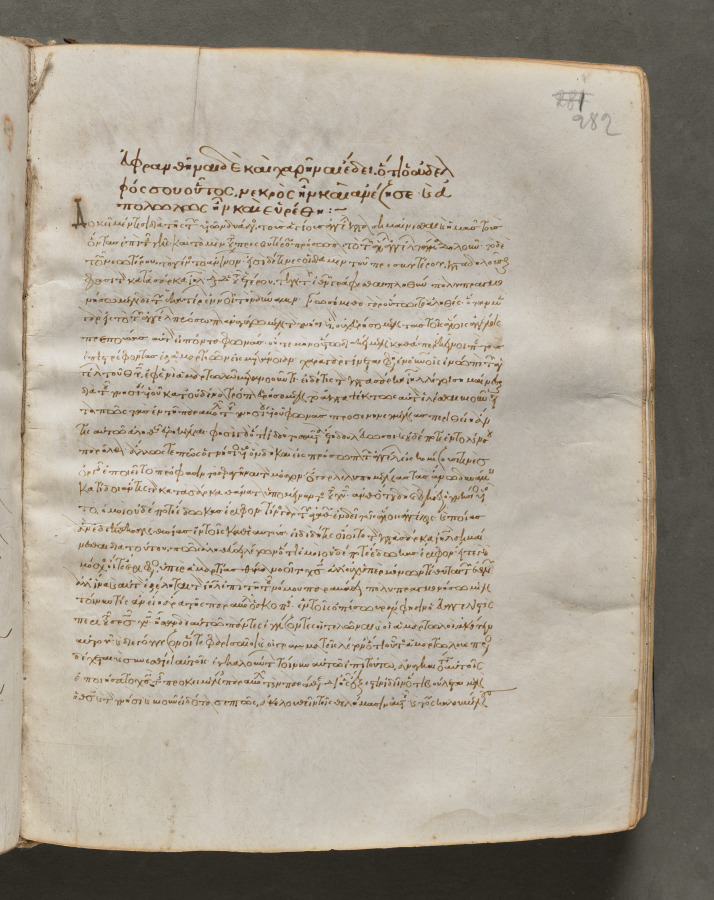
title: Text, folio 282 (recto), from a Gospel Book with Commentaries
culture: Byzantium, Constantinople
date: c. 1000–1100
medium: ink, tempera, and gold on vellum; leather binding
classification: Bound Volume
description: Each of the four gospels in this book opens on a page with brilliantly illuminated borders depicting the author of the text as well as birds—principally peacocks, symbols of the immortality of the soul—and fountains, representing the fountain of life and the salvation of the soul. This volume consists of 428 leaves with texts in Greek. Its level of sophistication suggests that it was probably written and decorated in a monastery in Constantinople.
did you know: Gospel books were carried in procession through Byzantine churches.